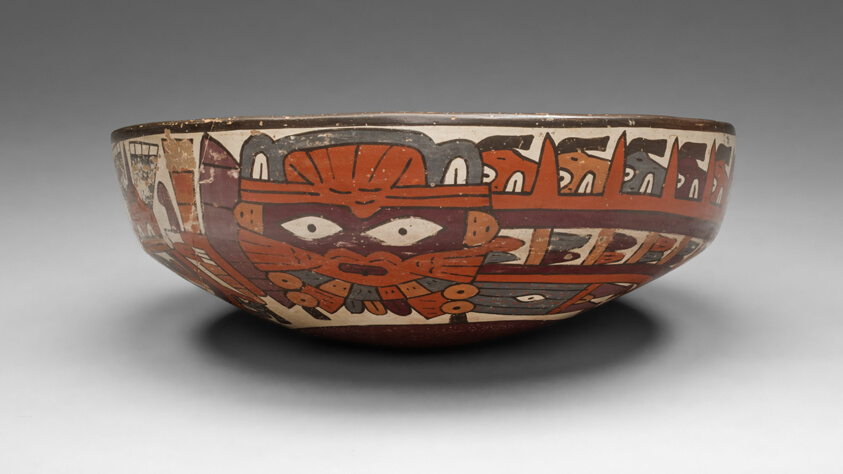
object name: Vessel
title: One of a Pair of Matched Bowls Depicting Costumed Ritual Performers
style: nazca, early intermediate period, Pre-Columbian, americas, andes, Arts of the Americas, andean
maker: Nazca; South coast, Peru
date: 180 BCE–500 CE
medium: Ceramic and pigment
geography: Peru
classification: bowl; earthenware; art of the americas; ceramics; vessel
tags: abstract figures, agriculture, costumed performer, anthropomorphic figure, ritual performer